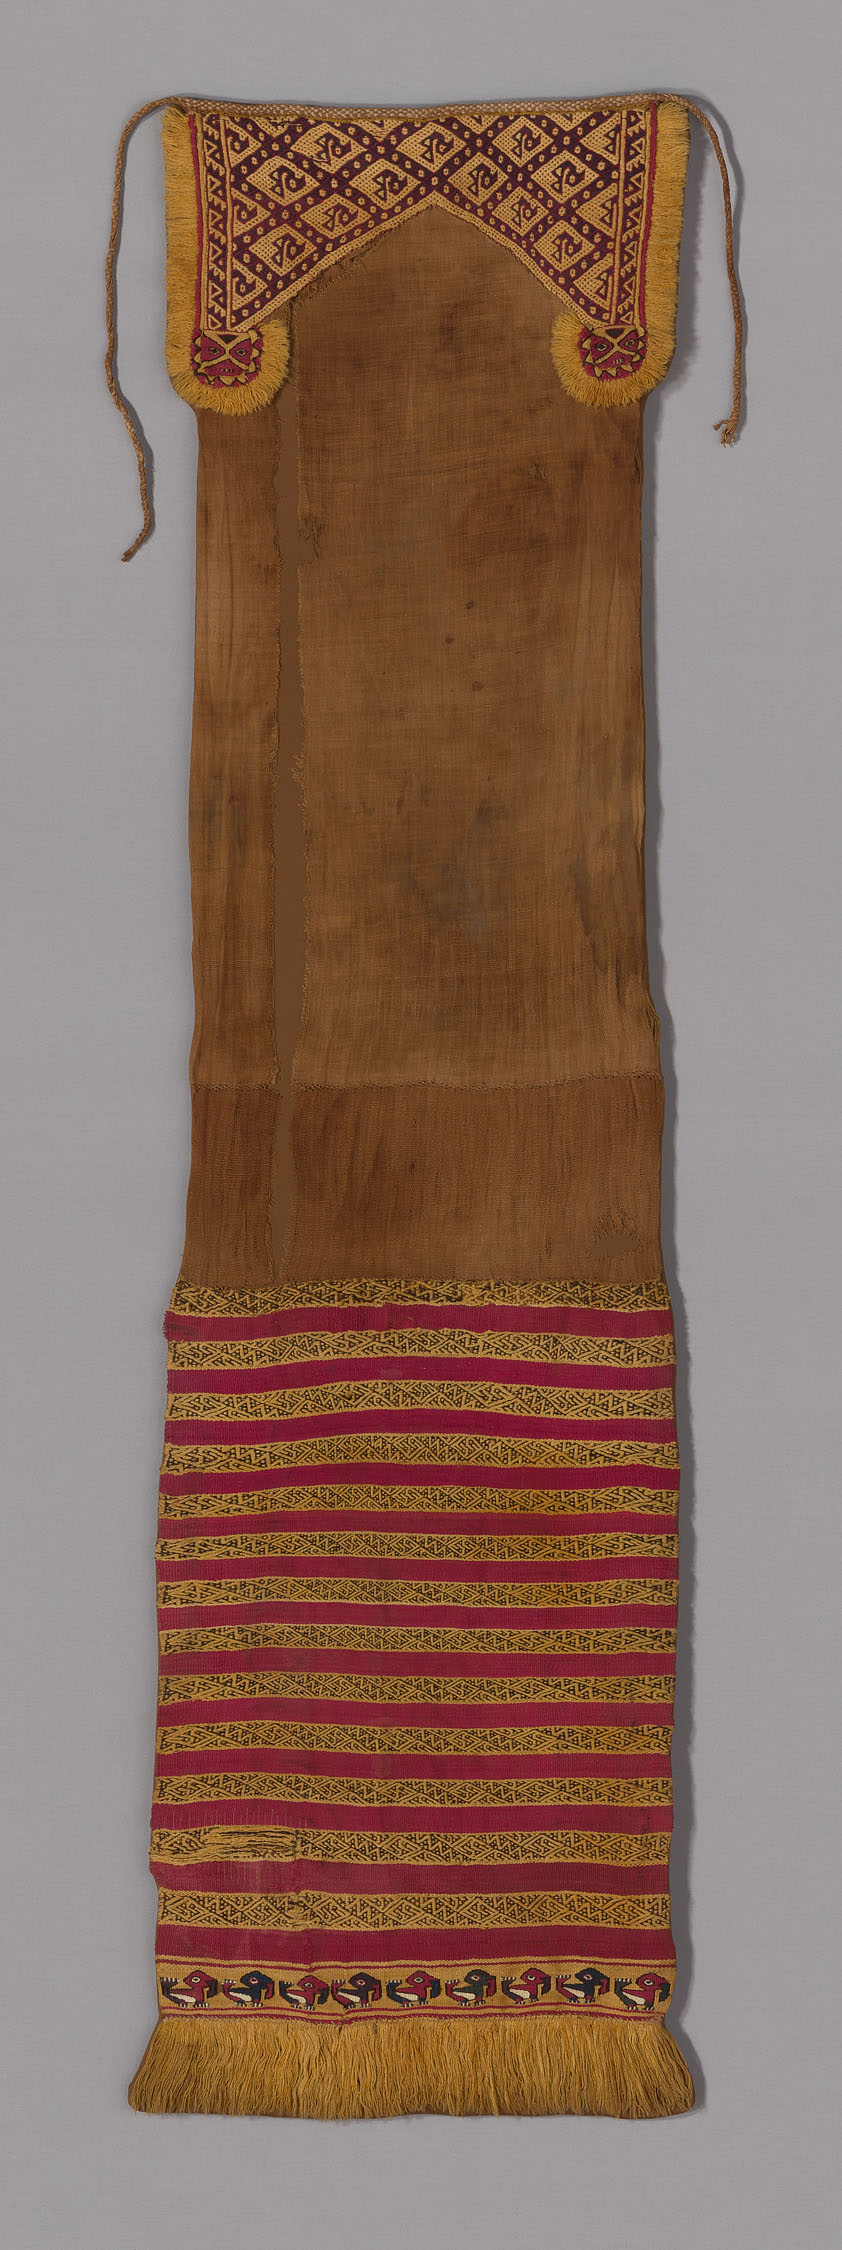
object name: Costume and Accessories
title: Loincloth Panel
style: chancay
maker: Chancay (Peru, Central coast)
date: A.D. 1000/1476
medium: Cotton and wool (camelid), plain weave; slit tapestry weave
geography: Peru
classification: textile; weaving; costume; dress (garment); clothing; costume component